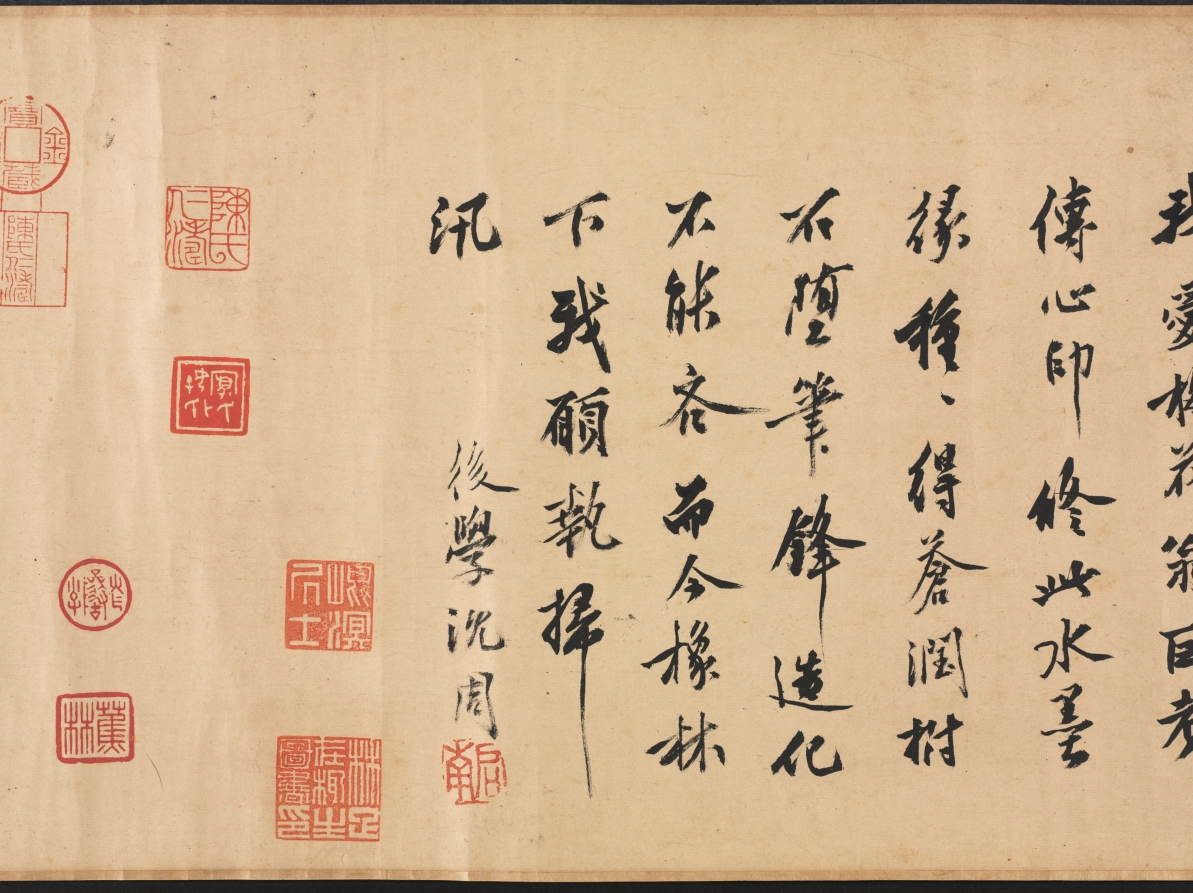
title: Poetic Feeling in a Thatched Pavilion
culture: China, Yuan dynasty (1271-1368)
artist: Wu Zhen (Chinese, 1280–1354)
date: 1347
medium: handscroll; ink on paper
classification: Painting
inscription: 依村構草亭，端方意匠宏。 林深禽鳥樂，塵遠竹松輕。 泉石俱延賞，琴書悅性情。 何當謝凡近，任適慰平生。 至正七年丁亥冬十月，為元澤戲作草亭詩意。梅沙彌書 [印]楳華盦; 嘉興吳鎮仲圭書畫記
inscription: 我愛梅花翁，巨老傳心印。 脩此水墨缘，種種得蒼潤。 樹石墮筆鋒，造化不能吝。 而今橡林下，我願執掃汛。 後學沈周 [印]启南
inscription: Colophon by Chen Rentao (1952): 予求梅道人畫二十年不可得。所見多膺鼎，即故宮所藏山水數軸都不可靠。傳世真迹，惟《漁父圖》、《嘉禾八景》與此《草亭詩意》而已。壬辰十月十四日余大病初愈，居家休養，研山師忽持此圖相贈。展卷披覽，頓覺精神沛振，如服僊藥。同日又得宋拓柳公權《神策軍紀聖德碑》，及群玉堂藏《真草書千(字)文》，皆海內孤本。一日得數寶，欣喜何如，書以志幸。 陳仁濤識 [印]陳氏仁濤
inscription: Colophon by Chen Rentao: 此圖作於至正七年丁亥，時年六十八，盖其晚年神品也。 濤又識 [印]陳仁濤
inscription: Title on frontispiece by Li Dongyang 李東陽 (1447-1516).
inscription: 33 additional seals: 1 seal of Li Chao-heng 李肇亨 (1592-1664)：檇李李肇亨書畫記; 9 seals of Liang Qingbiao 梁清標 (1620-1691): 蒼巖子、蕉林、蕉林梁氏書畫之印、蕉林秘玩、蕉林書屋、蕉林玉立氏圖書、棠邨 (appears twice)、棠邨審定; 1 seal of Wang Yirong (1845-1900): 懿榮; 3 seal of Li Yanshan (1898-1961): 雙銕笛樓 (appears twice)、硯山心賞; 12 seals of Chen Rentao 陳仁濤（1906-1968）：陳氏仁濤、陳仁濤珍藏印、金匱寶藏·陳氏仁濤 (appears three times)、金匱秘笈、金匱室、金匱室精鑒璽 (appears twice)、金匱室主、金匱神品、仁濤奇緣; 1 seal: 崐溟居士; 1 seal: 林止在㭯生圖書印; 3 seals unidentified.